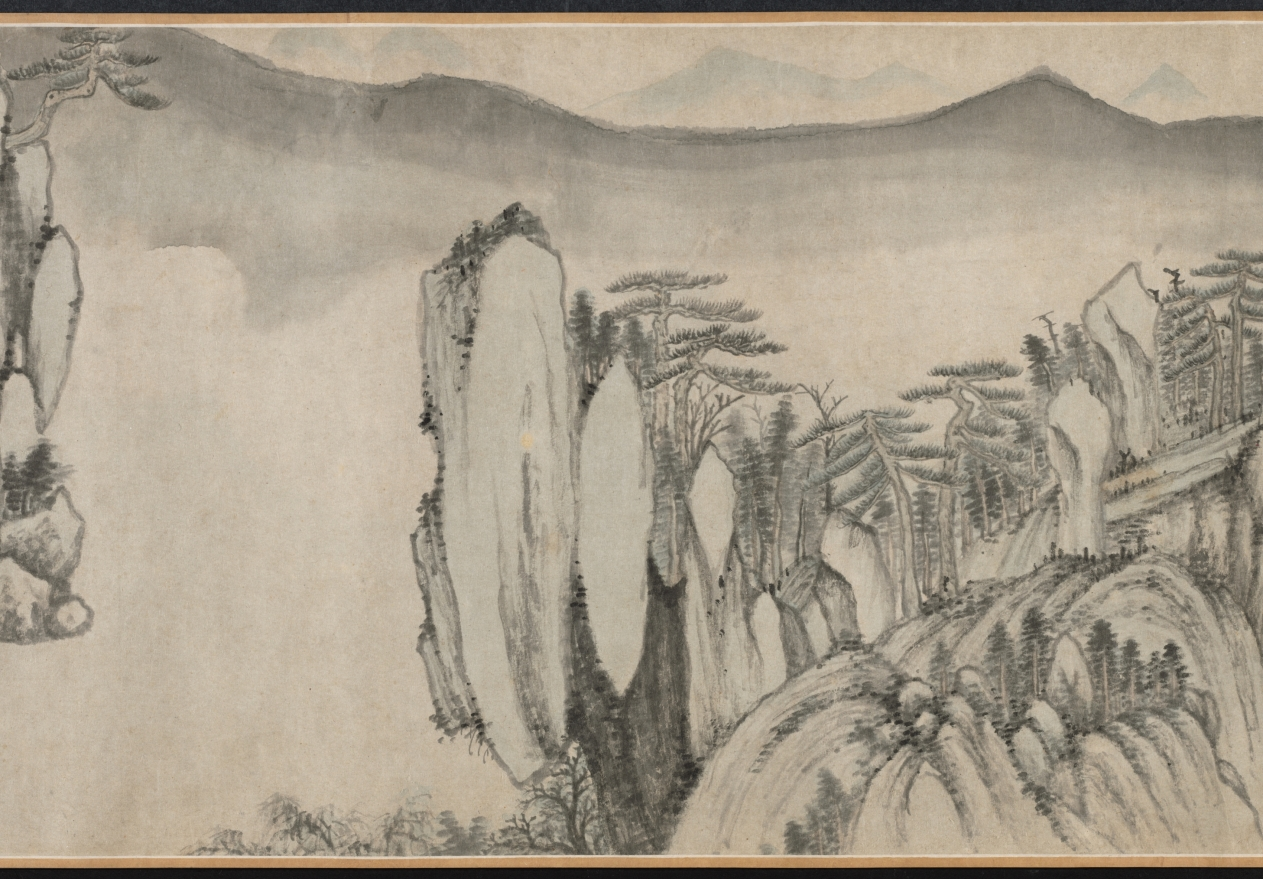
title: Mt. Taibo in the Style of Wang Meng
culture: China, Ming dynasty (1368–1644)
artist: Du Qiong (Chinese, 1396–1474)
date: 1442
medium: handscroll; ink and light color on paper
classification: Painting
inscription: Artist's inscription, signature, and 11 seals: [1 seal] Tung-yüan chai. Huang-ho-shan-ch'iao [Wang Meng] painted a painted called T'ai-po Mountain. Its brushwork is superior and admirable, which is very close to Yu-ch'en [Wang Wei, 699-759]. The cleverness of its composition, the maple groves and rustic temples, the inaccessible ravines and autumnal plateaus, the periolous peaks and strange rocks, etc., all seem to be so natural. The paper is only a little over eight feet, but the landscape has the range of a thousand miles. Once you open and note the contents, it is as if one were roaming among the mountain peaks enveloped in mist and clouds, and forgot the dusty world. When I first saw this, I was so mixed with excitement and joy that I could not take my hands off the painting. So I put it on the table, and tried my best to imitate it, forgetting sleeping and eating for about three months before it was completed. Although I do not dare to tread in the footsteps of Huang-ho shan ch'iao, I took great pains to capture his spirit in composition and colors. I do not know whether it would pass the judgment of the experts. On the fifteenth day of the fifth month, the seventh year of the Cheng-t'ung year [1442], inscribed by Tung-yüan, Tu Chiung. [2 seals] Yung-chia; Ching-chieh ming-men. [8 seals on painting] Tung-yüan chai; Ching-chieh ming-men; Yung-chia; Tu Ch'iung yin; Tung-yüan (repeated 5 times). trans. WKH/LYSL 3 colophons and 7 additional seals: 1 colophon and 2 seals of Chou Ting (1401-1487); 1 colophon and 2 seals of Wu K'uan (1435-1504); 1 colophon, dated 1655, and 2 seals of Lan Ying (1585-after 1664).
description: When a Chinese painter "imitated" a painting by a past master, the intention was never to produce an exact copy. Du Qiong, the Ming painter from Suzhou, is a case in point. The painting style of this handscroll is actually closer to that of Huang Gongwang (1269–1354) than to the style of Wang Meng (about 1301–1385). Both masters were active during the previous dynasty and are among the so-called Four Great Masters of the Yuan dynasty (1279–1368). In this painting, the interplay of styles, including Du Qiong's own, contribute to an inner dimension that is more than visual. Mt. Taibo is located in the province of Zhejiang and is known for its scenic beauty. In this scroll, however, it is not depicted literally. The image is an ideal representation of mountains in southeastern China.